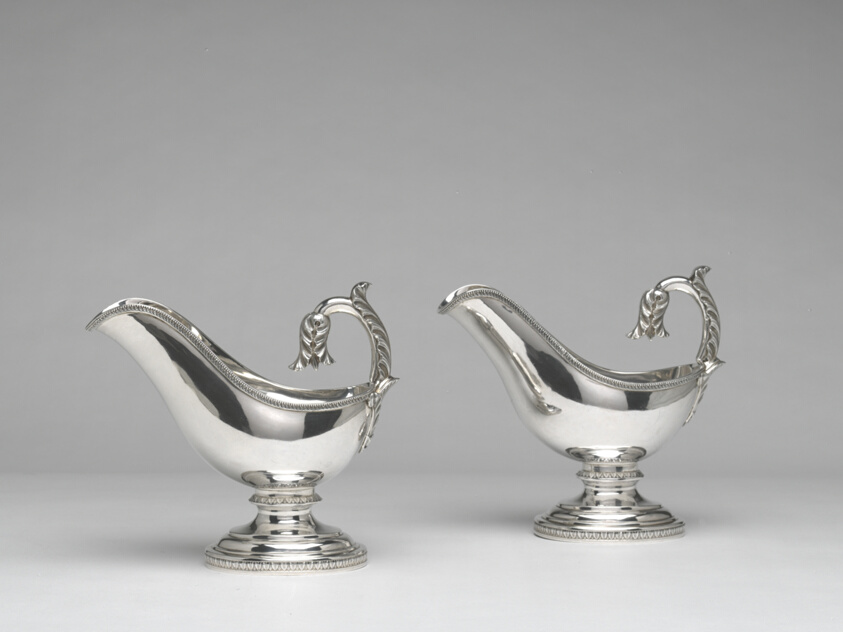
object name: Metalwork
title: Pair of Sauceboats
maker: Thomas Fletcher (American, 1787–1866); Philadelphia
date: c. 1830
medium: Silver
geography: Philadelphia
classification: dish (vessel); vessel for serving food; sauceboat; decorative arts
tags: dining, drinking